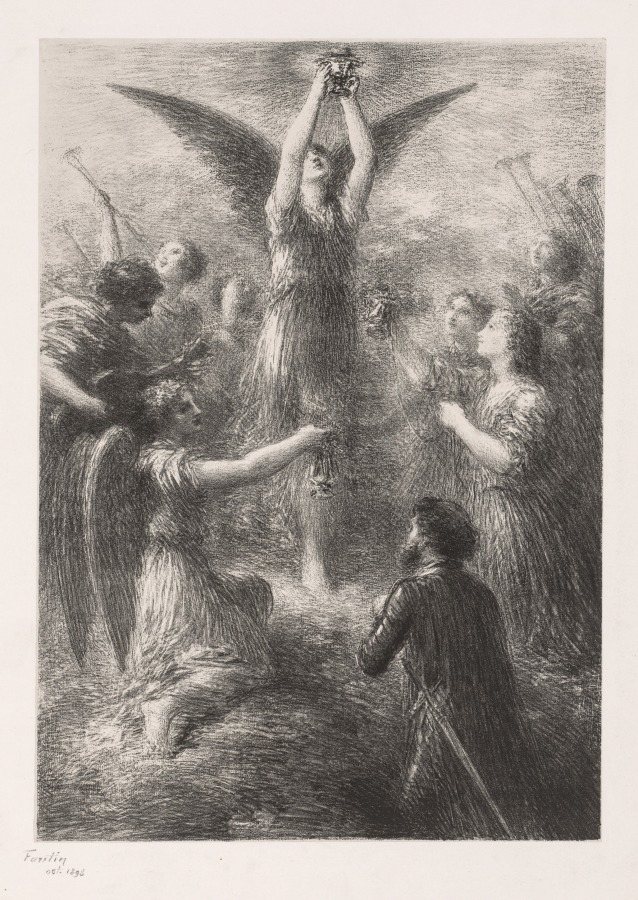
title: Prelude to Lohengrin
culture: France, 19th century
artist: Henri Fantin-Latour (French, 1836–1904)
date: 1898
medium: lithograph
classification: Print